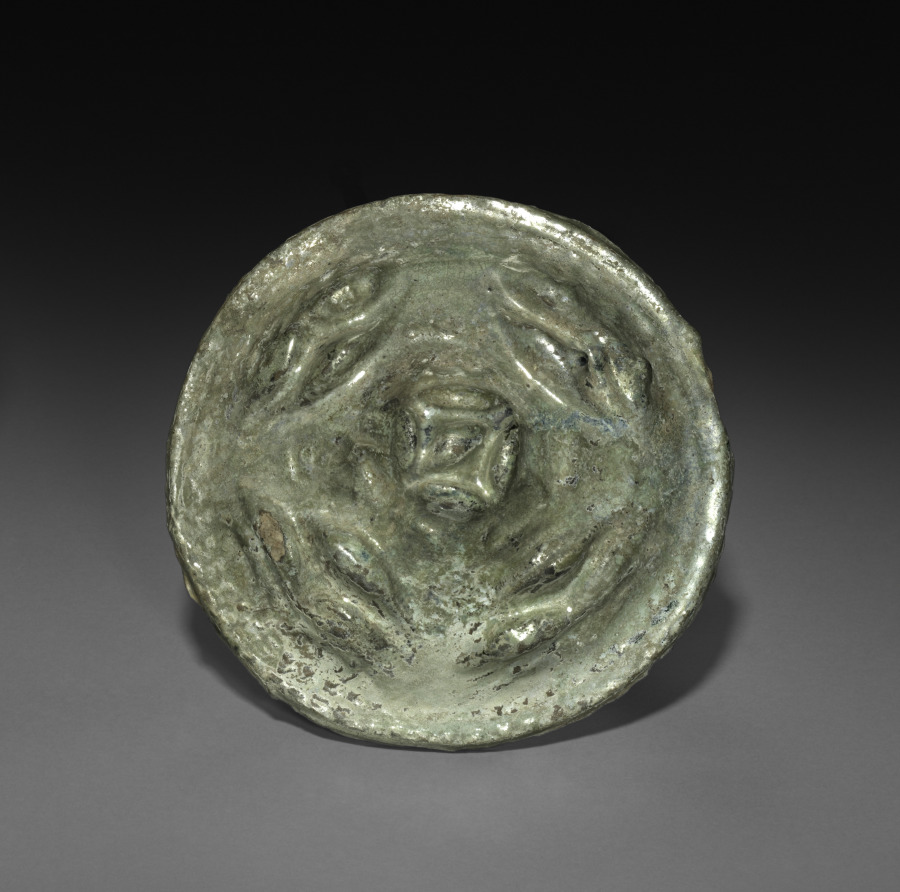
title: Covered Jar (Hu) (lid)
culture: China, Eastern Han dynasty (25–220 CE)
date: 25–220 CE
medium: earthenware with lead glaze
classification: Ceramic